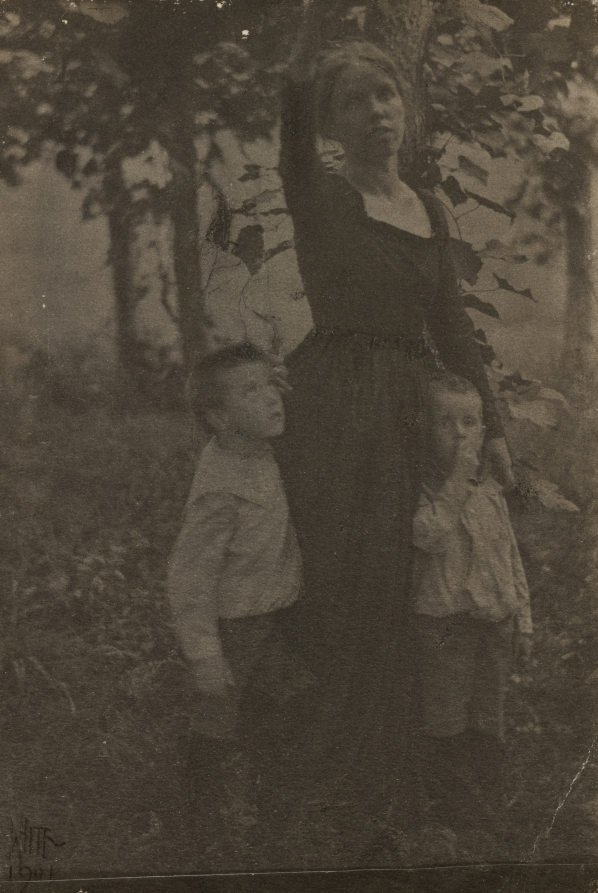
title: Jane White, Lewis White, and Maynard White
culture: America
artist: Clarence H. White (American, 1871–1925)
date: 1901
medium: platinum print with pencil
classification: Photograph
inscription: Written in pencil on recto: "White [signed] 1901"; in pencil on verso: "Mrs. W. & Children"; "by Clarence H. White / left=Lewis White / centre=Mrs. Clarence H. White / (Jane Felix White-nicknamed/Dince) / right=Maynard White."